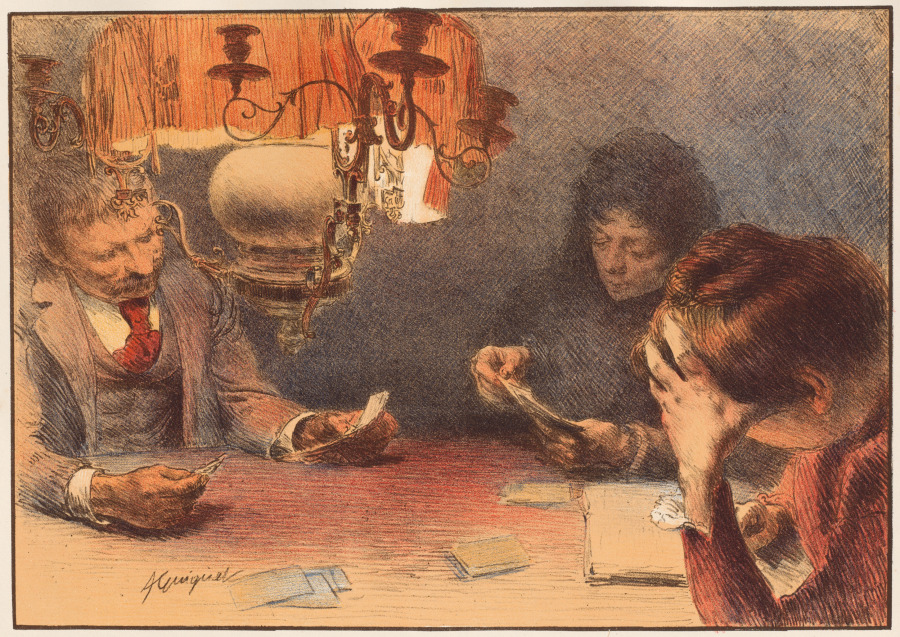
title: La Lampe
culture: France, Paris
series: L'Estampe Moderne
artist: François Guiguet (French, 1860–1937)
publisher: Imprimerie Champenois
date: 1899?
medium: Color lithograph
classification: Bound Volume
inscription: upper right corner: blindstamp of l'Estampe Moderne (Lugt 2790); lower left corner, printed in image: Fguiguet